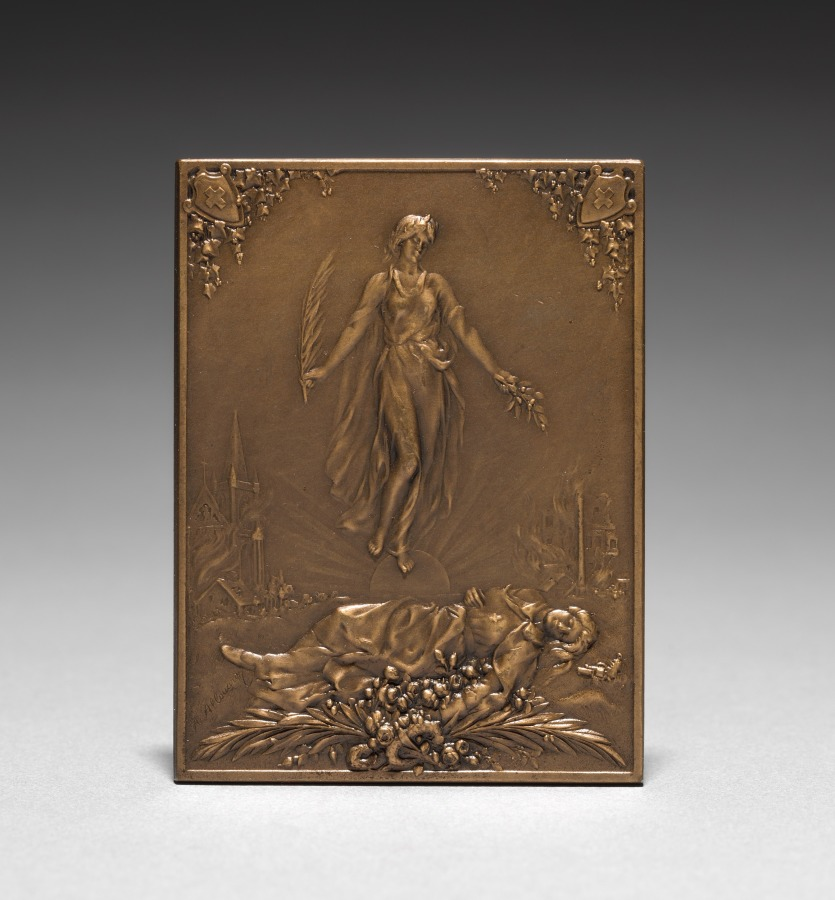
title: Medallion (obverse)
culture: France, 19th-20th century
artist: Henri Emile Allouard (French, 1844–1929)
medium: bronze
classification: Metalwork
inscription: "Aux dames de la Croix rouge. Virtus Caritas."